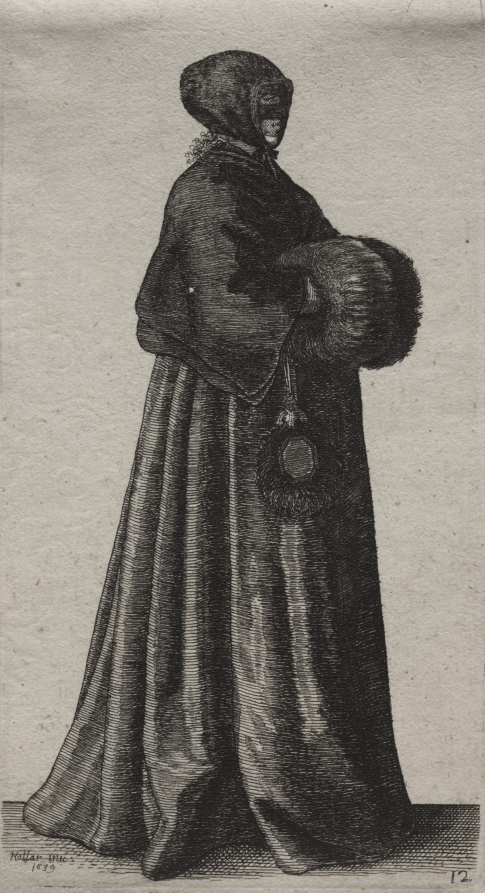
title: The Several Habits of English Women, from the Nobility to the Country Women as they are in these times: The Woman with Mask, Hood and Muff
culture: Bohemia, 17th century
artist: Wenceslaus Hollar (Bohemian, 1607–1677)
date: 1639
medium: etching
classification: Print